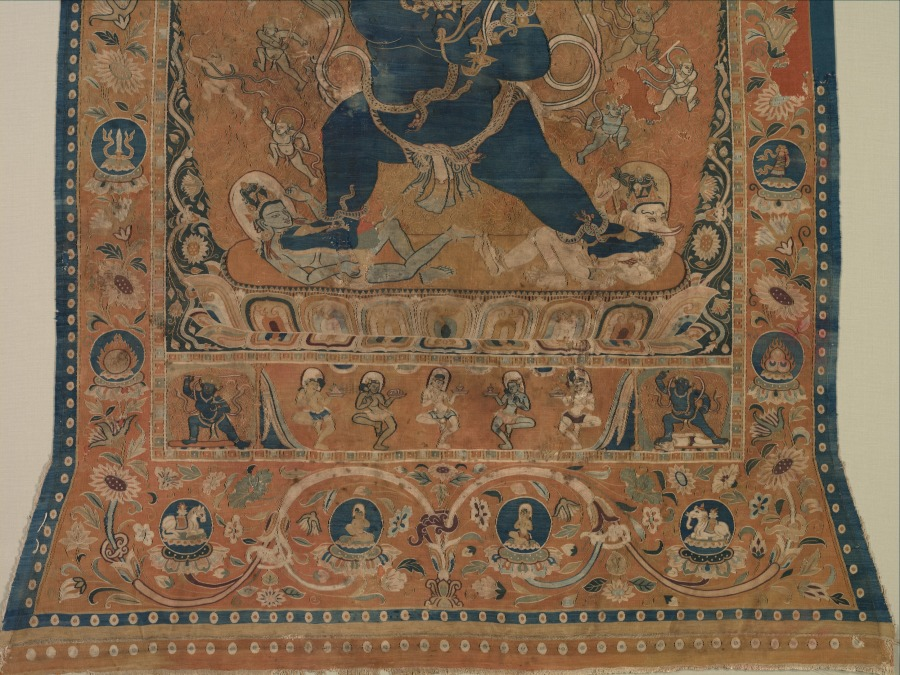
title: Achala, King of the Wrathful Ones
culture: China, Zhejiang Province, probably Hangzhou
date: early 1200s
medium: Thangka, silk tapestry with pearls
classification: Textile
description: The powerful blue body of Achala, meaning “immovable,” dominates the composition. He holds a sword to cut through ignorance and a noose for catching illusions that plague the path to enlightenment. Small personifications of furious destroyers of illusion (maya) emanate from him on either side, each with his own weapon. This image expresses what advanced practitioners would visualize in meditation rituals, as explained in Buddhist texts called tantras. Woven with a sophistication matched only by products of the Hangzhou looms, this devotional tapestry made its way to Khara-Khoto, capital of the Tangut Empire located in present-day Mongolia and Central Asia, where tantric Buddhism was prevalent.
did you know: The elephant-headed figure under his left foot is a demonic divinity, a yaksha, who creates obstacles to enlightenment.